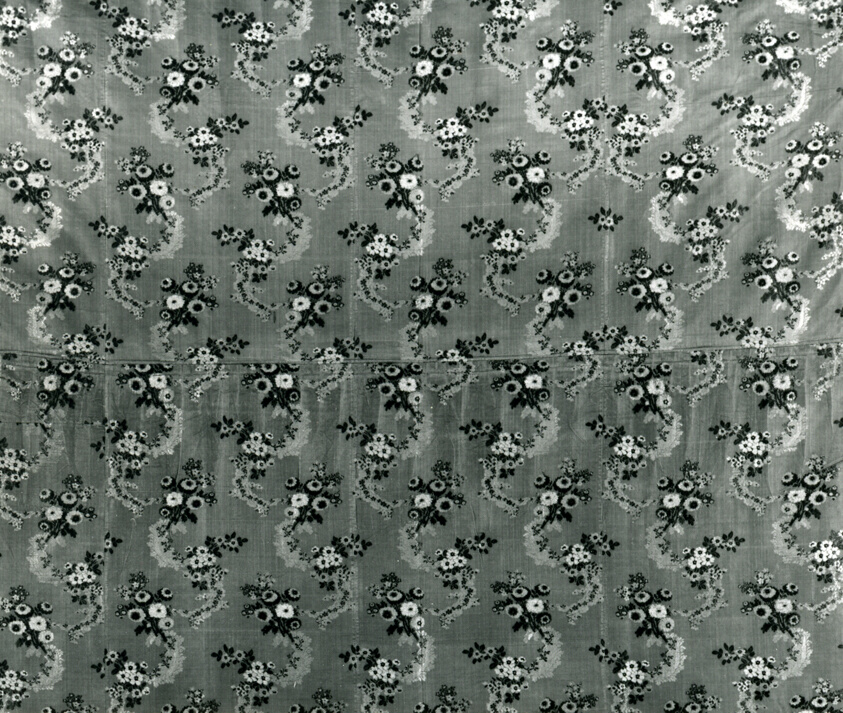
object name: Textile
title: Panel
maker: France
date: Late 18th century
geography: France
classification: textile; weaving